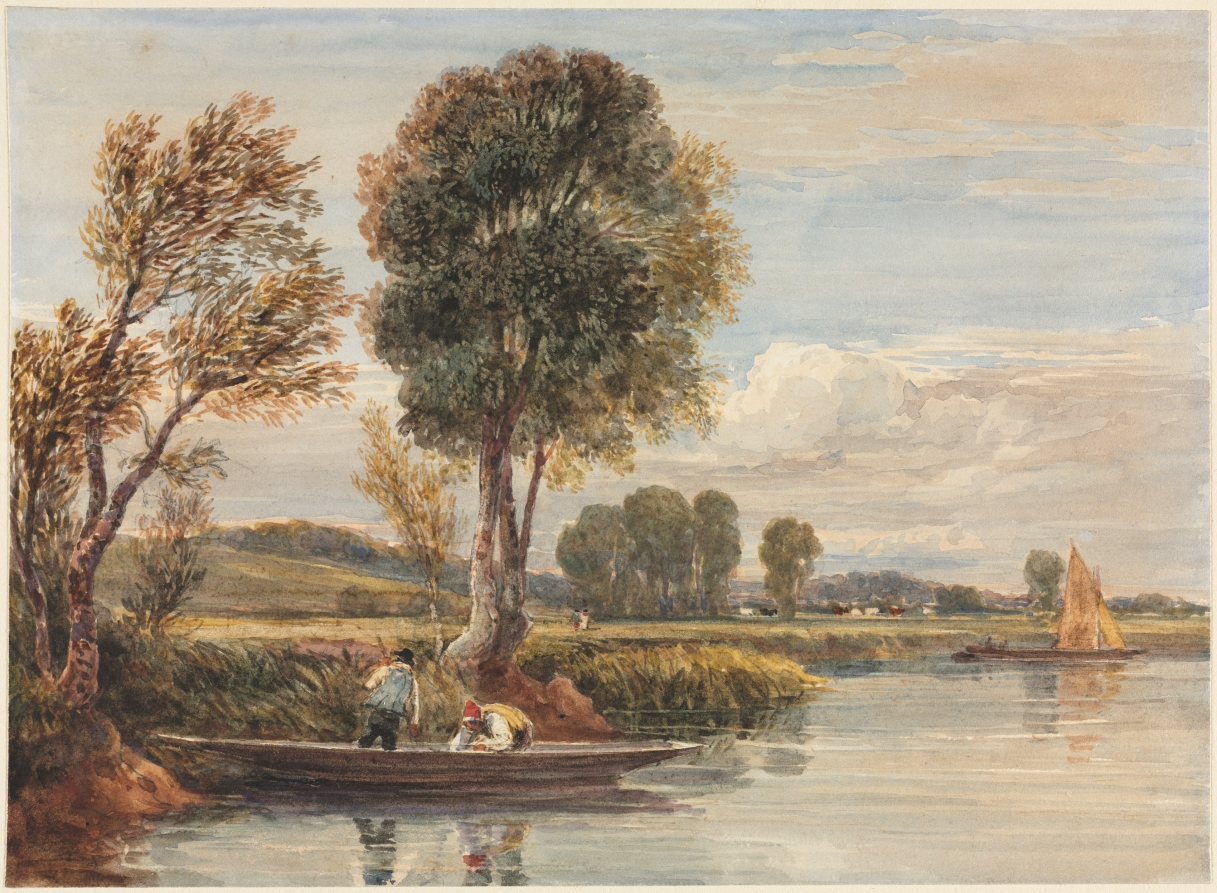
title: On the Thames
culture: England, 19th century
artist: David Cox (British, 1783–1859)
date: c. 1827–29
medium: watercolor with graphite and scraping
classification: Drawing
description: One of the great champions of watercolor painting during the first half of the 19th century, David Cox is most celebrated for his atmospheric landscapes that convey a sense of movement and light as affected by nature. Here, translucent streaks of blue and gray in the sky suggest movement among the clouds, and small dashes of color throughout the foreground trees create a sense of rustling vegetation. Reflections on the river’s surface shimmer with light.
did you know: David Cox began his career as a painter of theatrical scenery in his native Birmingham.